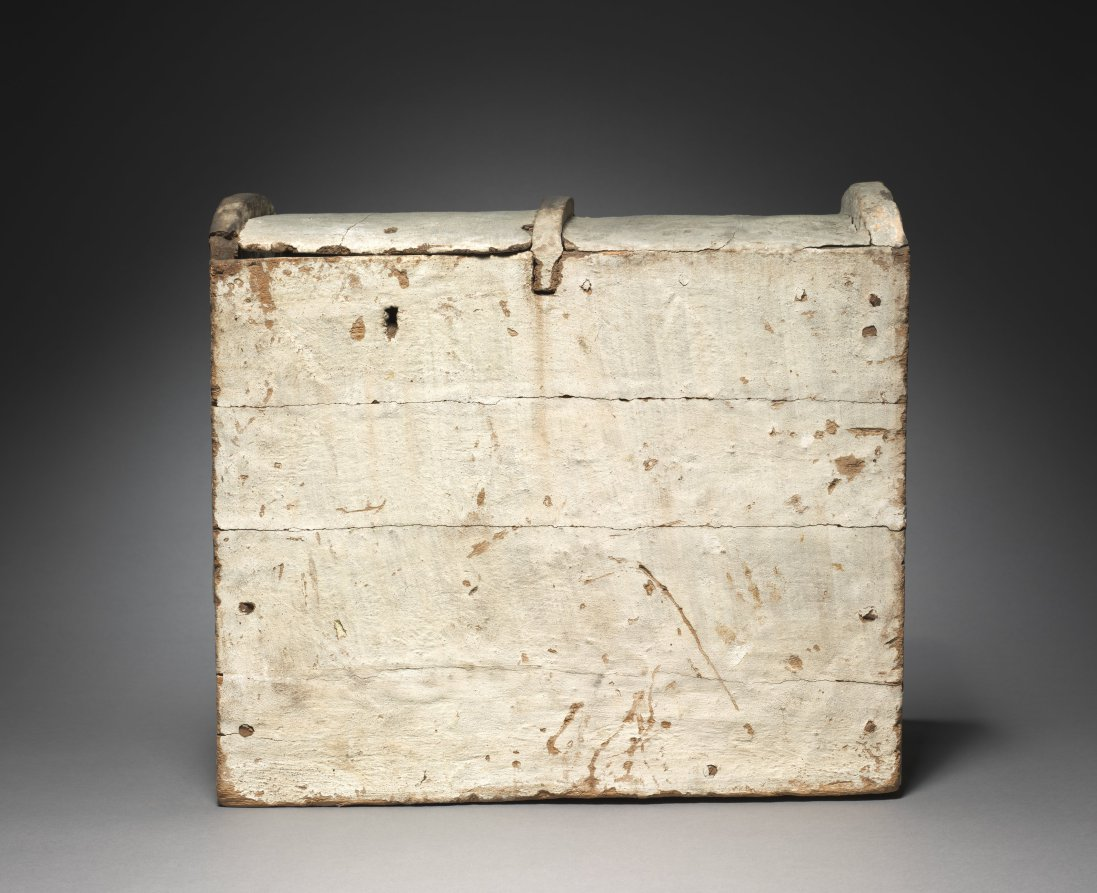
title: Shawabty Box of Bakenmut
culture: Egypt, Third Intermediate (1069–715 BCE), Dynasties 21–22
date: 1000–900 BCE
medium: gessoed and painted buckthorn wood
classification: Funerary Equipment